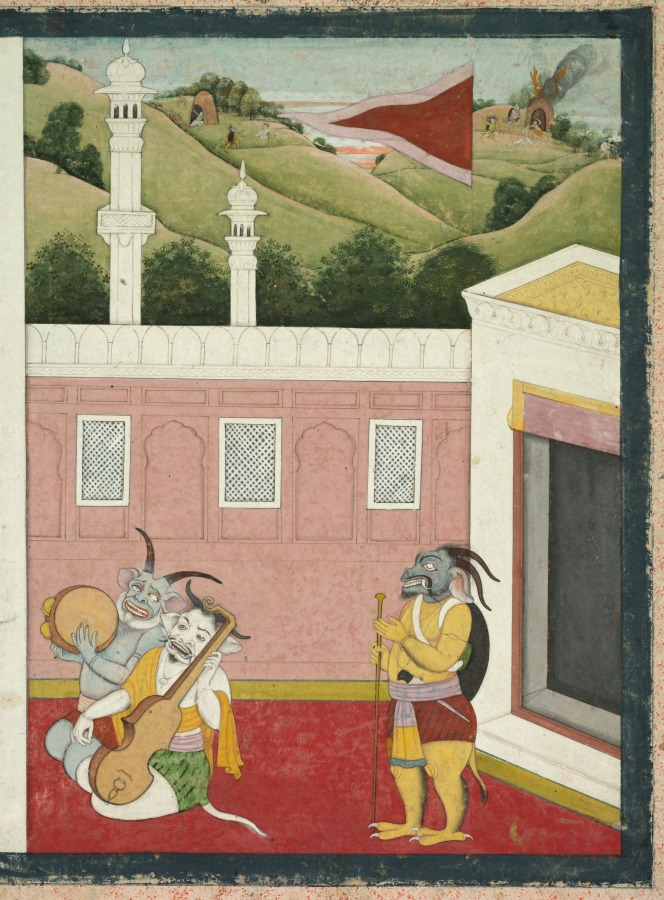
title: King Bana in his court, from an Usha-Aniruddha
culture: Northern India, Pahari kingdoms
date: c. 1760–70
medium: Gum tempera and ink on paper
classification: Painting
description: This portrait of a demon king depicts him listening to the report of one of his ministers. He may be hearing the news that his daughter Usha has been secretly receiving Krishna’s grandson Aniruddha in her bedchamber. The artist has depicted Bana with his 20 arms emerging like tentacles from his body. The members of his multicolored demon court are imaginatively rendered combinations of beasts and humans. In the background, demons harass holy men by burning their huts and chasing them away from their settlements.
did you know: Clara Taplin Rankin, the donor of this painting, was a trustee of the CMA as well as the Musical Arts Association and the Cleveland Institute of Music.